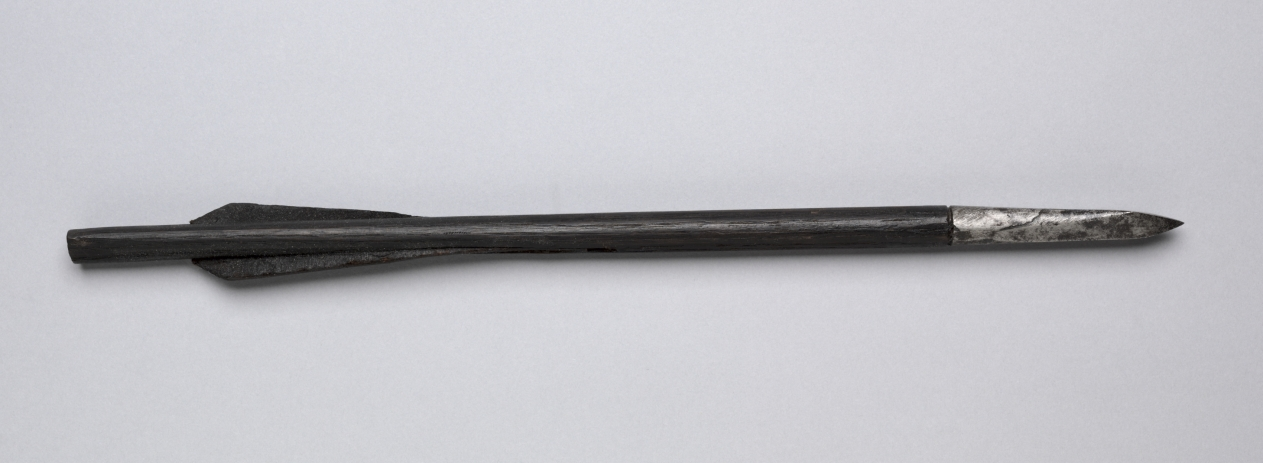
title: Crossbow Bolt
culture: Germany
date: 1500s–1600s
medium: wood, leather, steel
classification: Arms and Armor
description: Created by skilled technicians from wood, steel, and leather, each bolt was handmade with slight differences in construction and design. These bolts were used with a crossbow and they were more powerful than traditional bows and arrows. A soldier could carry many bolts and still maneuver easily around the battlefield.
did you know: Bolts with leather feathering were used mainly in the Tyrolean area, which includes northern Italy and western Austria.